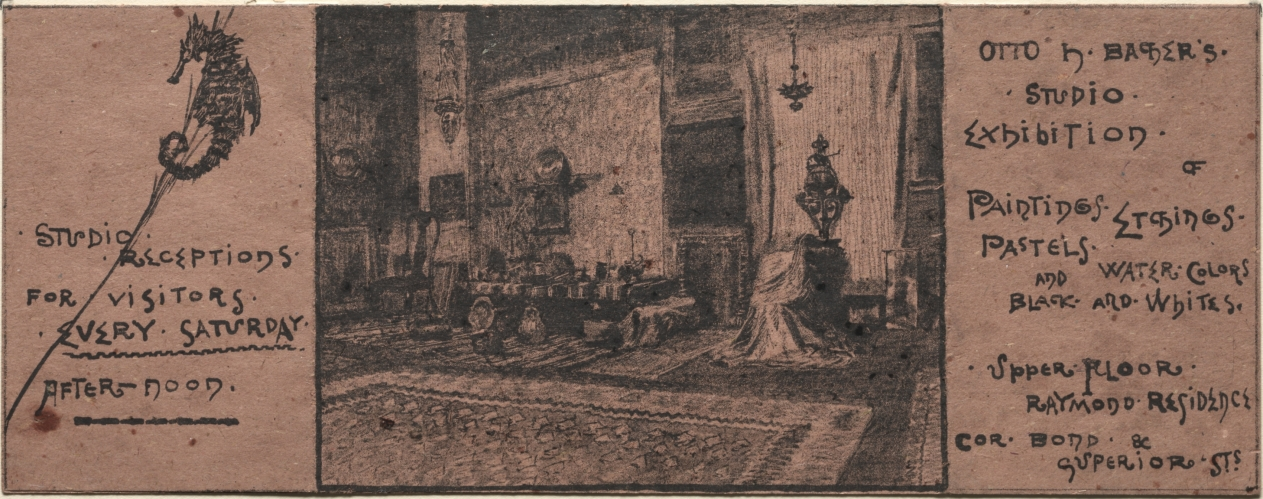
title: Exhibition Invitation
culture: America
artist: Otto H. Bacher (American, 1856–1909)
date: 20th century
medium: lithograph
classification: Print